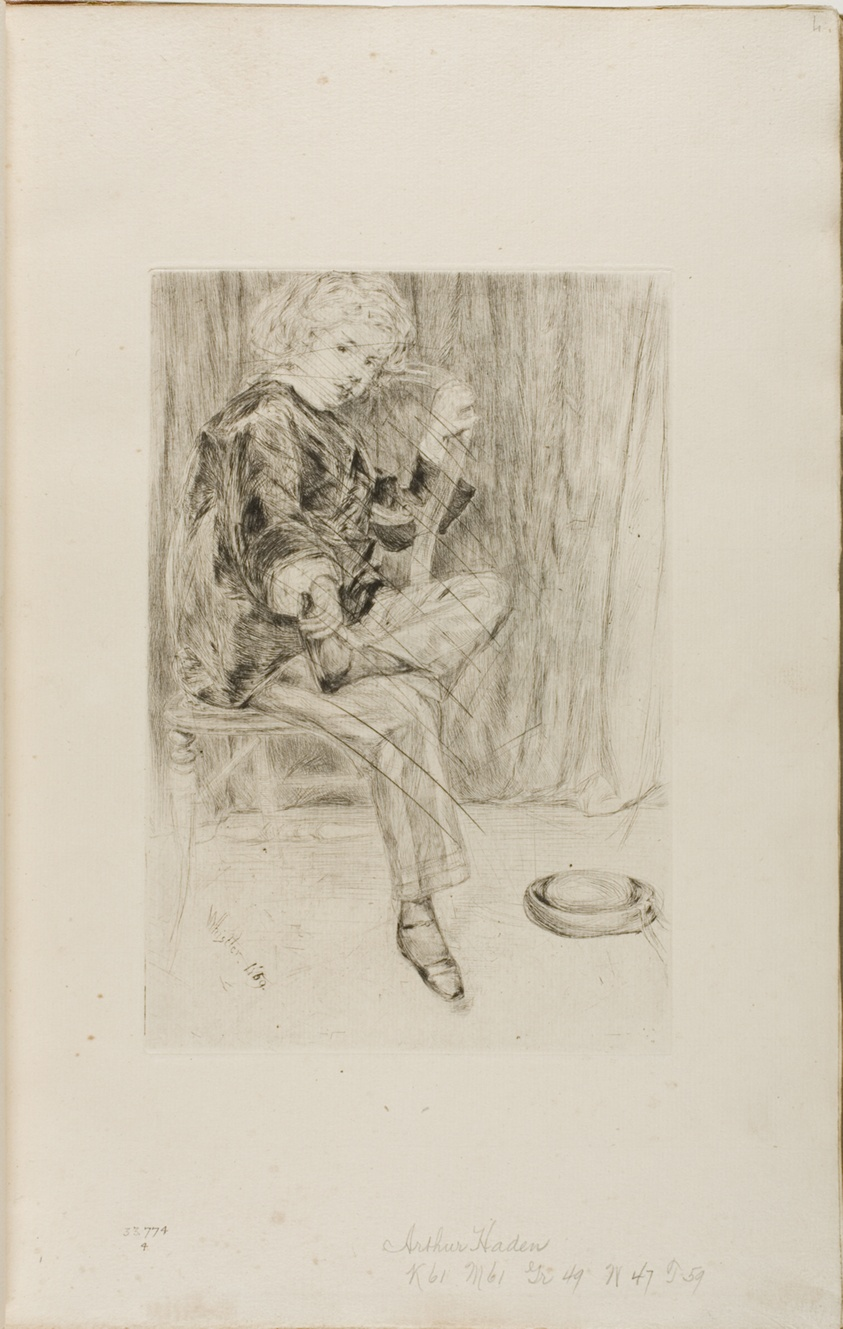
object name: Print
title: Arthur Haden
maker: James McNeill Whistler (American, 1834-1903)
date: 1859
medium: Drypoint, with drypoint cancellation, in black ink on ivory laid paper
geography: United States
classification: drypoint; prints and drawing; book; print; paper